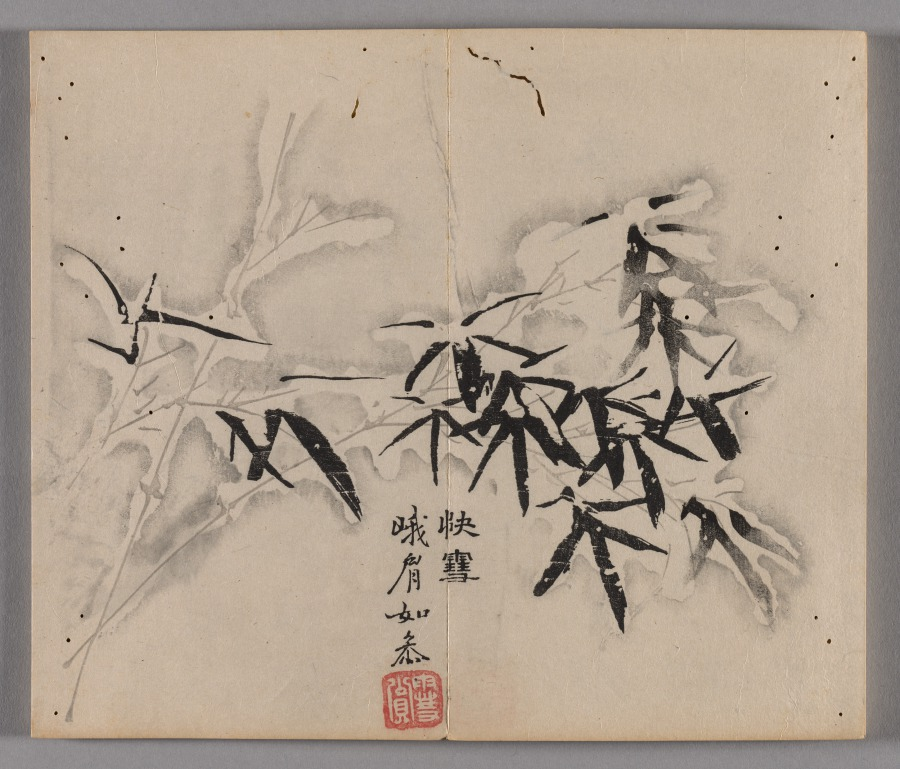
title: Ten Bamboo Studio Painting and Calligraphy Handbook (Shizhuzhai shuhua pu): Bamboo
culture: China, Qing dynasty (1644-1911)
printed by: Hu Zhengyan (Chinese, c. 1584–1674)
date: 1633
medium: Woodblock-printed book; ink and colors on paper; first edition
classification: Print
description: Color printing reached a level of perfection in the early 1600s, as seen in this Ten Bamboo Studio Collection of Calligraphy and Painting and the Mustard Seed Garden Manual of Painting (printed 1679 and 1701). The painterly quality, precision in registering (aligning) the woodblocks, and harmonious colors made them the most successful color print editions in Chinese history. Both editions were printed and compiled in Nanjing, spread nationwide, and had a great impact on the arts in Japan and Korea.